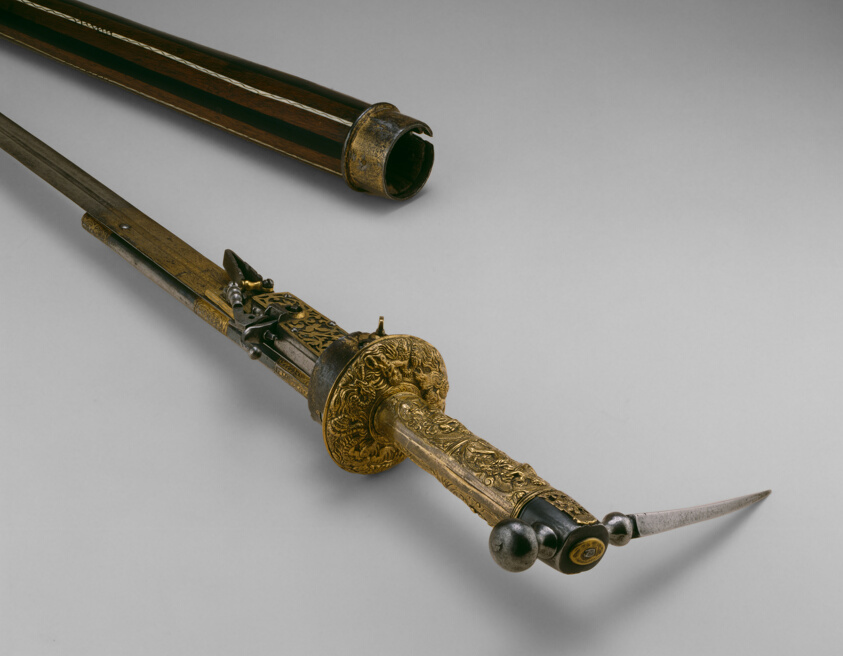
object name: Arms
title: Walking Stick-Hammer-Sword-Wheellock Pistol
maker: South German, probably Augsburg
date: 1590/1600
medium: Steel, iron, bronze, brass, gilding, walnut, ebony, nd staghorn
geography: Augsburg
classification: combination weapon; arms; arms and armor